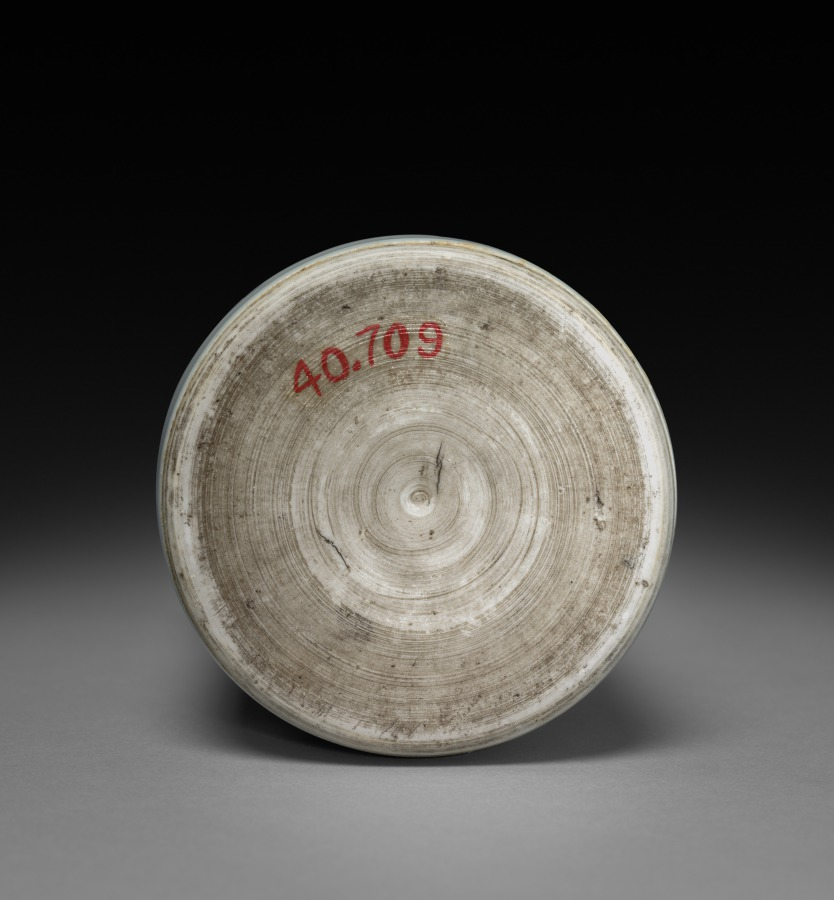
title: Brush Holder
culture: China, Jiangxi Province, Jingdezhen kilns, "Transitional period," Ming dynasty (1368–1644), Chongzhen reign (1628–1644)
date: 1628–44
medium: porcelain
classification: Ceramic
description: This porcelain brush holder is considered to have been made in the "Transitional period," a term used to define the period between about 1620 and 1683 when official kilns in Jingdezhen were no longer under imperial supervision due to the transition from the Ming to the Qing dynasties.